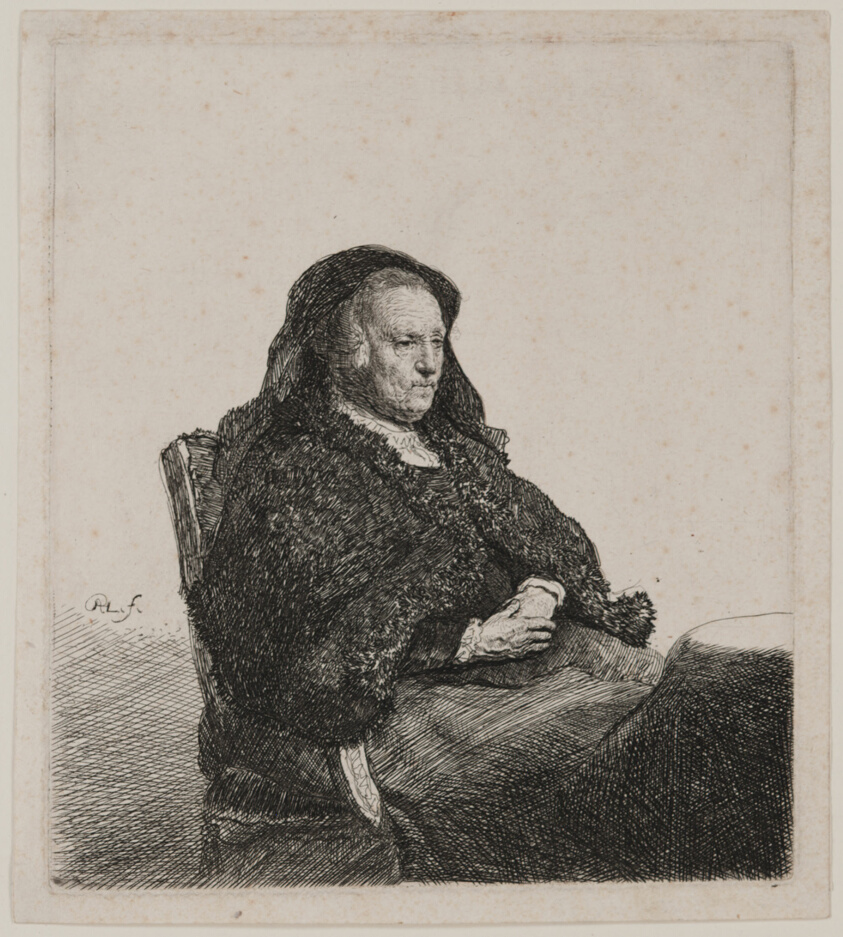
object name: Print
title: The Artist's Mother Seated at a Table, Looking Right: Three Quarter Length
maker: Rembrandt van Rijn (Dutch, 1606-1669)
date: c. 1631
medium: Etching on cream laid paper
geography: Holland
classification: etching; print; prints and drawing; paper